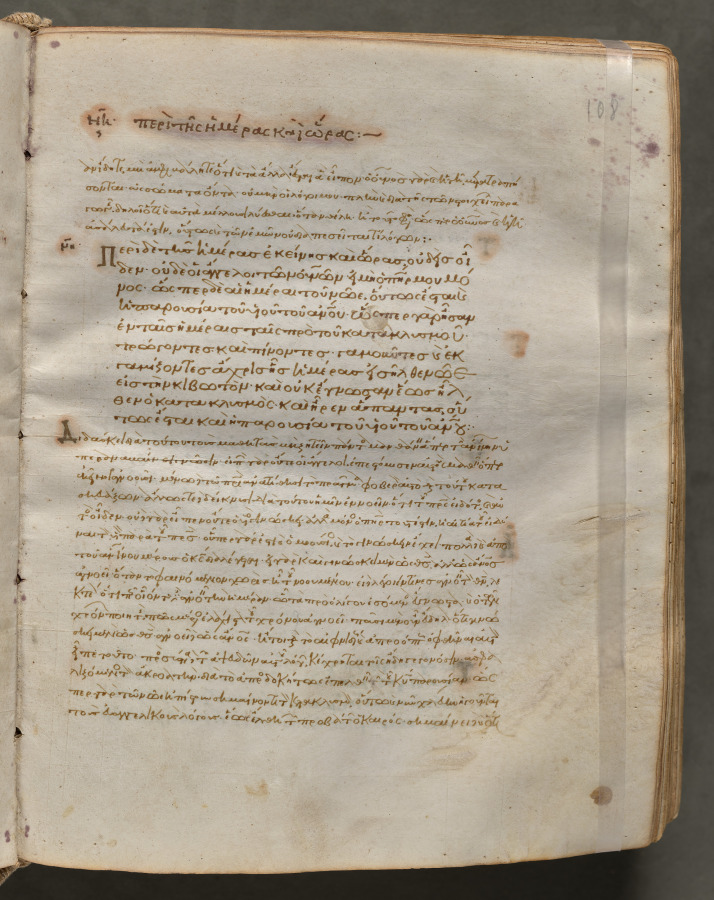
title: Text, folio 108 (recto), from a Gospel Book with Commentaries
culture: Byzantium, Constantinople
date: c. 1000–1100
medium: ink, tempera, and gold on vellum; leather binding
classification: Bound Volume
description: Each of the four gospels in this book opens on a page with brilliantly illuminated borders depicting the author of the text as well as birds-principally peacocks, symbols of the immortality of the soul-and fountains, representing the fountain of life and the salvation of the soul. This volume consists of 428 leaves with texts in Greek. Its level of sophistication suggests that it was probably written and decorated in a monastery in Constantinople.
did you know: Gospel Books were carried in procession through Byzantine churches.